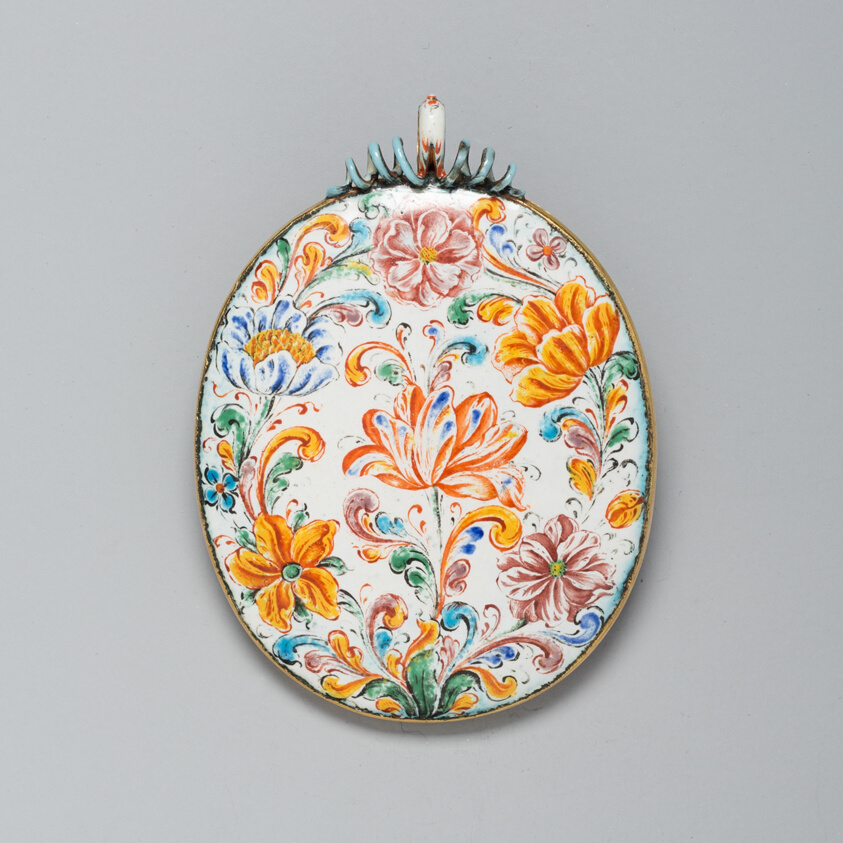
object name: Costume and Accessories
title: Portrait Miniature with Enameled Frame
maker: Dutch, French, or English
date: 1625-1675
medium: Gold, enamel, and watercolor on paper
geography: France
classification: jewelry; european decorative arts; costume